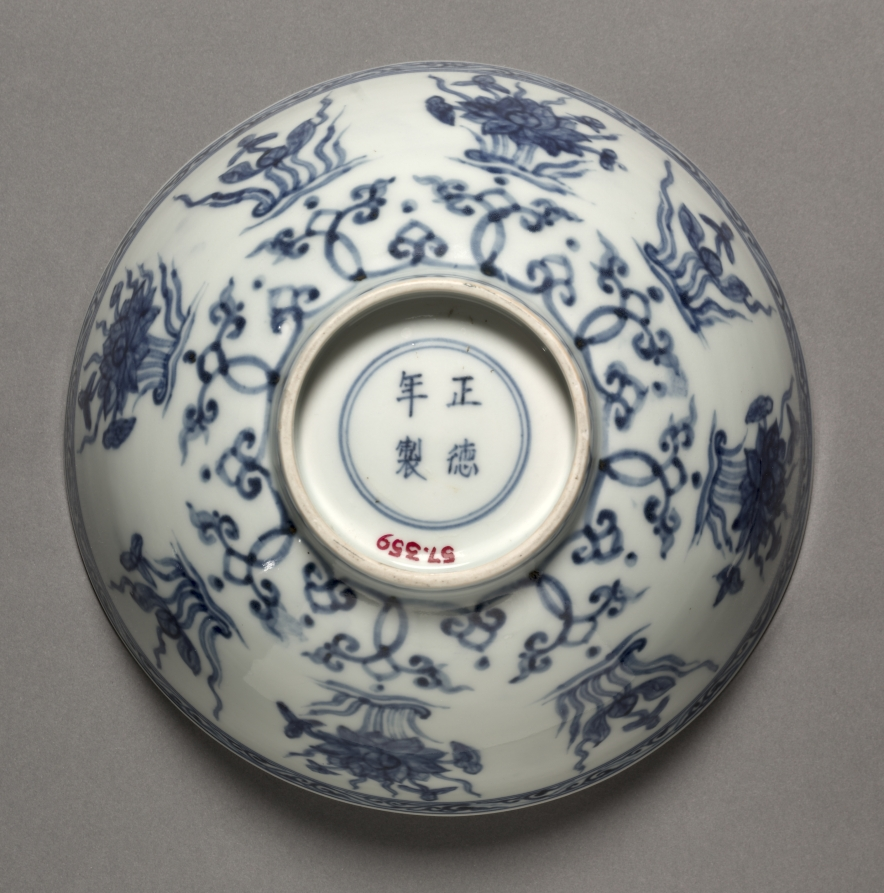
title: Bowl (wan) with Water Plants and Arabesques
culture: China, Jiangxi province, Jingdezhen kilns, Ming dynasty (1368-1644), Zhengde mark and reign (1506-21)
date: 1506–21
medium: porcelain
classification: Ceramic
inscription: 正德年製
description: Arabesques, an ornamental design of intertwined flowing lines inspired by Middle Eastern culture, appear on Chinese blue-and-white porcelain since the 1300s. The early Ming emperors, particularly the Zhengde emperor, promoted Islam and commissioned porcelain with Islamic calligraphy.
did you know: Chinese potters integrated foreign motifs, shapes, and ideas in order to cater to changing tastes and new customers in an increasingly global world.